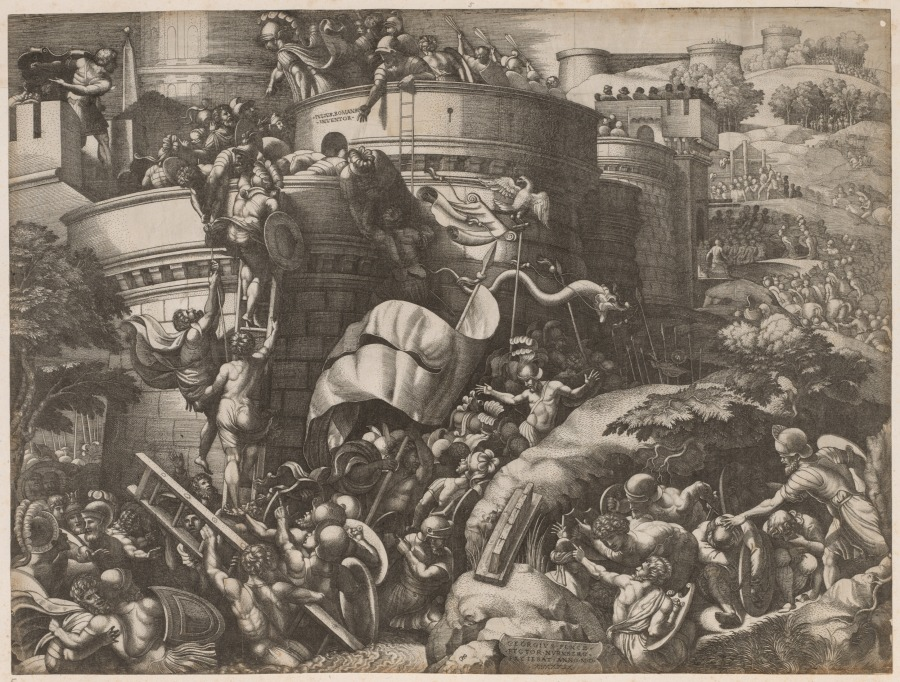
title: The Seige of Carthage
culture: Germany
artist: Georg Pencz (German, c. 1500–1550)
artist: after Giulio Romano (Italian, 1492/99–1546)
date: 1539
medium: engraving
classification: Print